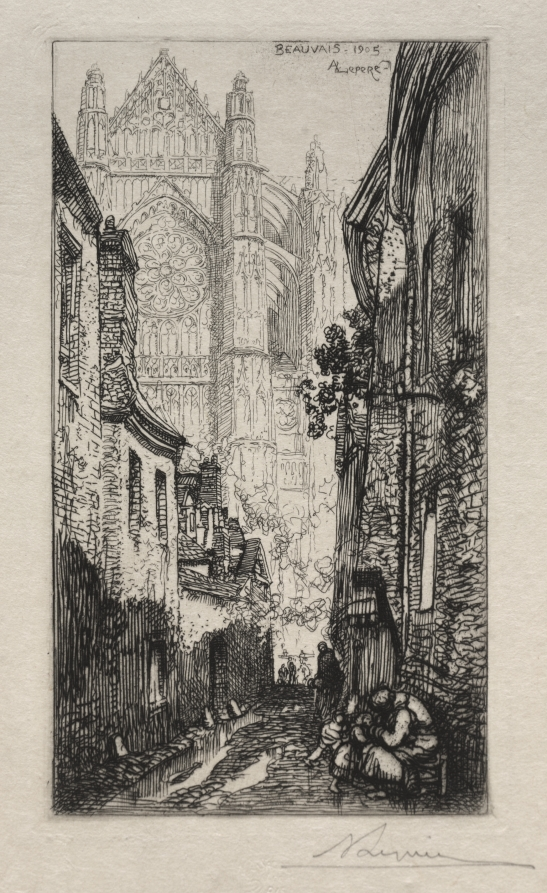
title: Narrow Street, Beauvais (Une Ruelle, Beauvais)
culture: France, 20th century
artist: Auguste Louis Lepère (French, 1849–1918)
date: 1905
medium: etching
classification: Print